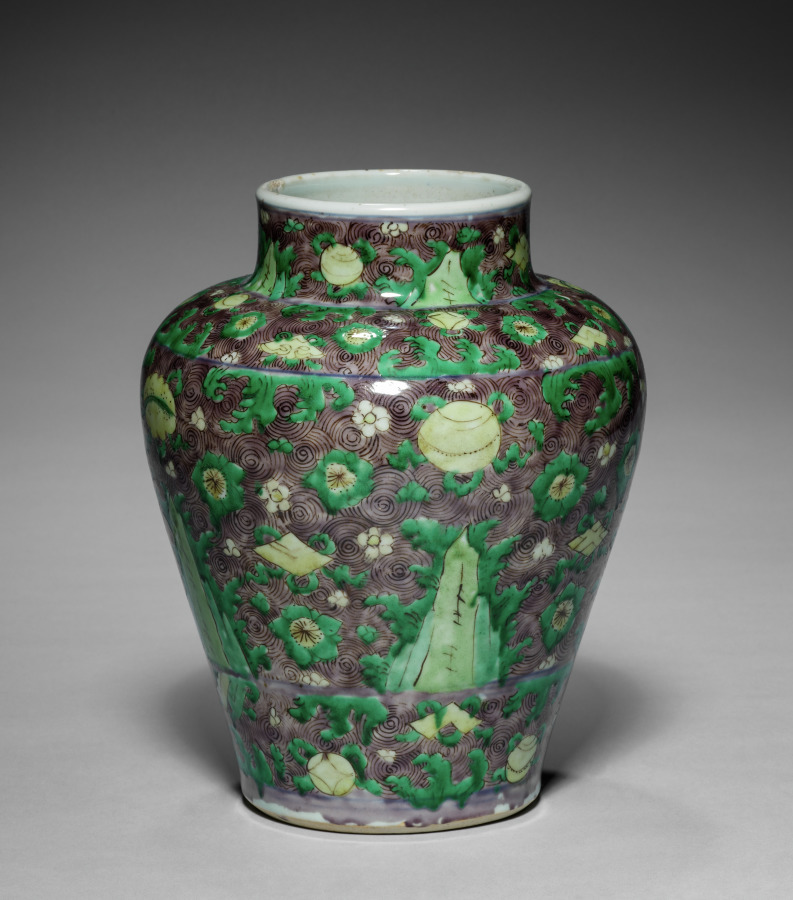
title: Baluster Jar and Cover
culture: China, Jiangxi province, Jingdezhen kilns, Ming dynasty (1368–1644) or Qing dynasty (1644–1911)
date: 1600–1650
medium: Porcelain with wucai (five-color) enamels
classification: Ceramic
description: The central motif on this jar is a mountain emerging from the sea, symbolizing Mount Sumeru in Buddhist cosmology, and representing the central axis in the universe in Daoism. White cherry blossoms floating on the wavy ground are surrounded by auspicious symbols such as the coin for wealth and the lozenge for victory. The yellow knob on the jar’s cover depicts a cherry blossom. Other fortuitous motifs—such as the leaf of protection, the pearl to grant wishes, the stone chime for celebration, rocks symbolizing longevity—also decorate the lid. While most jars have lost their covers over time, this jar retains its original lid.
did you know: The waves are depicted in a rich aubergine, or purple, glaze.